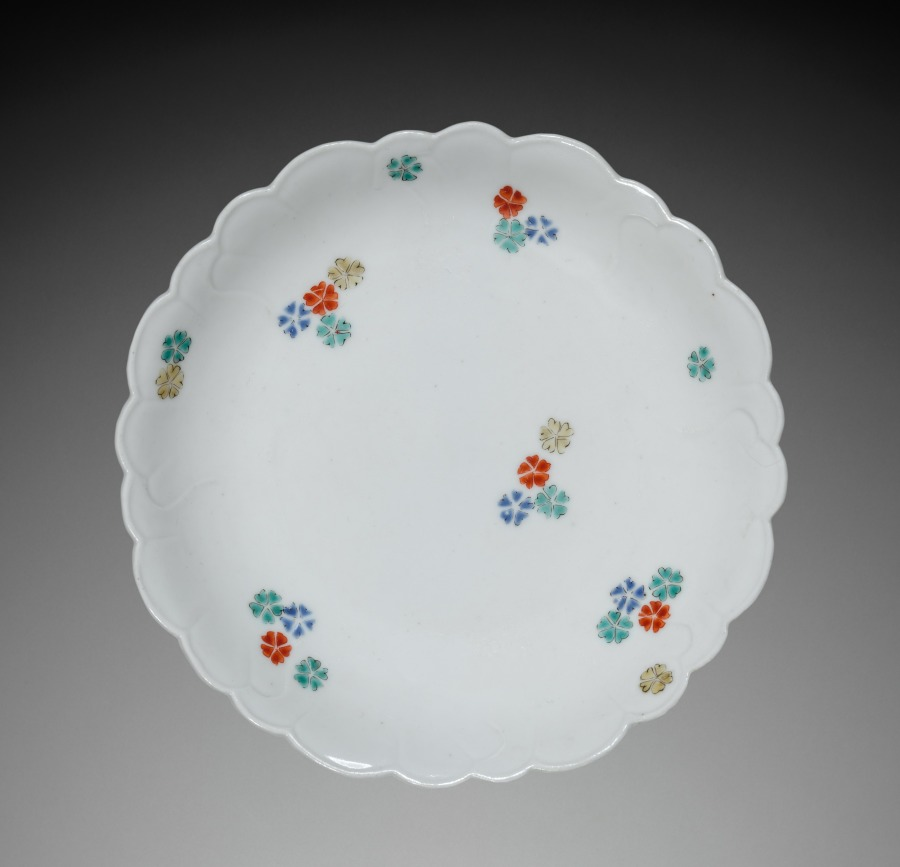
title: Small Dish with Flowers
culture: Japan, Edo period (1615–1868)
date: late 1600s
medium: porcelain with overglaze color enamel and molding (Hizen ware, Kakiemon type)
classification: Ceramic